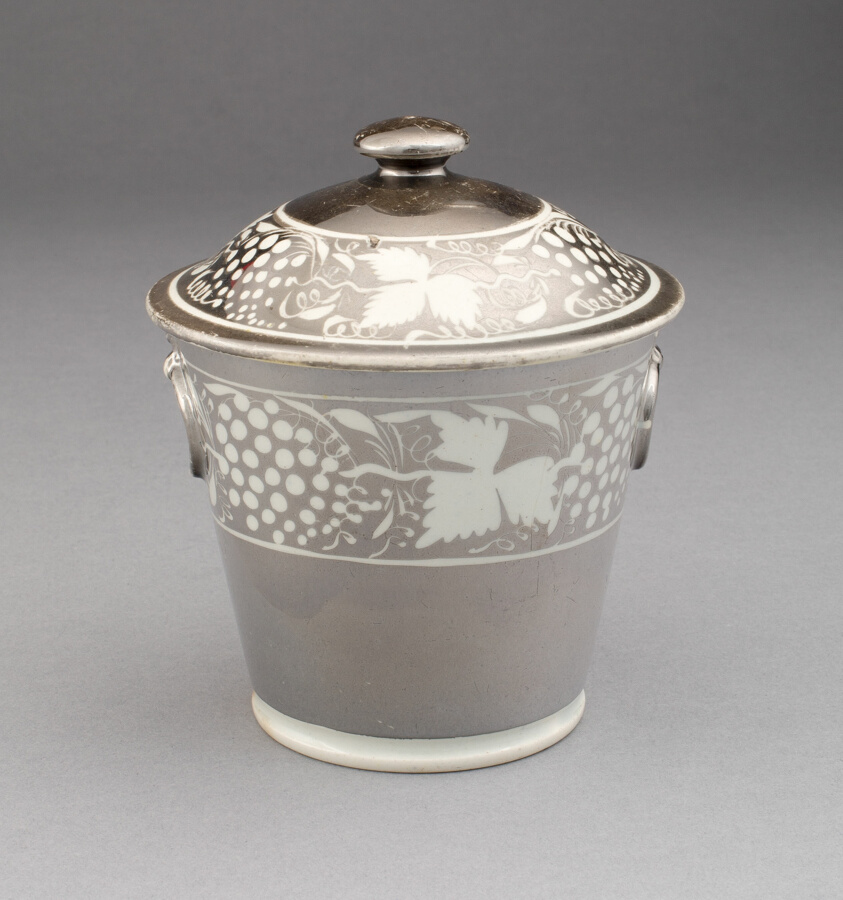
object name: Ceramics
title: Jar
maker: England, Staffordshire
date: 1810/20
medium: Lead-glazed earthenware with lustre decoration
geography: Staffordshire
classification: earthenware; ceramics; european decorative arts